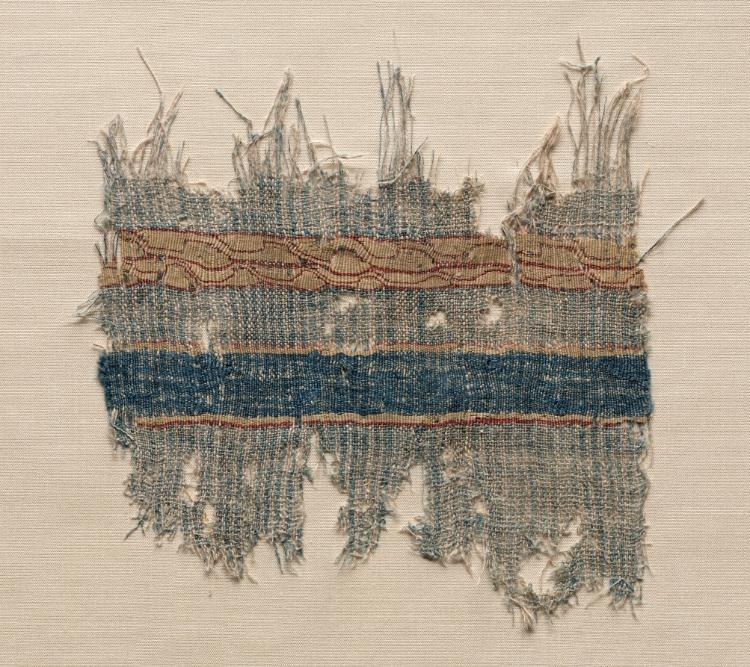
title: Fragment of a Tiraz-Style Textile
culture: Egypt, Fatimid period, Caliphate of al-Hafiz or later, AH 524-565, 12th Century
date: 1130 – 1169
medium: tabby ground with inwoven tapestry ornament; linen and silk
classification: Textile